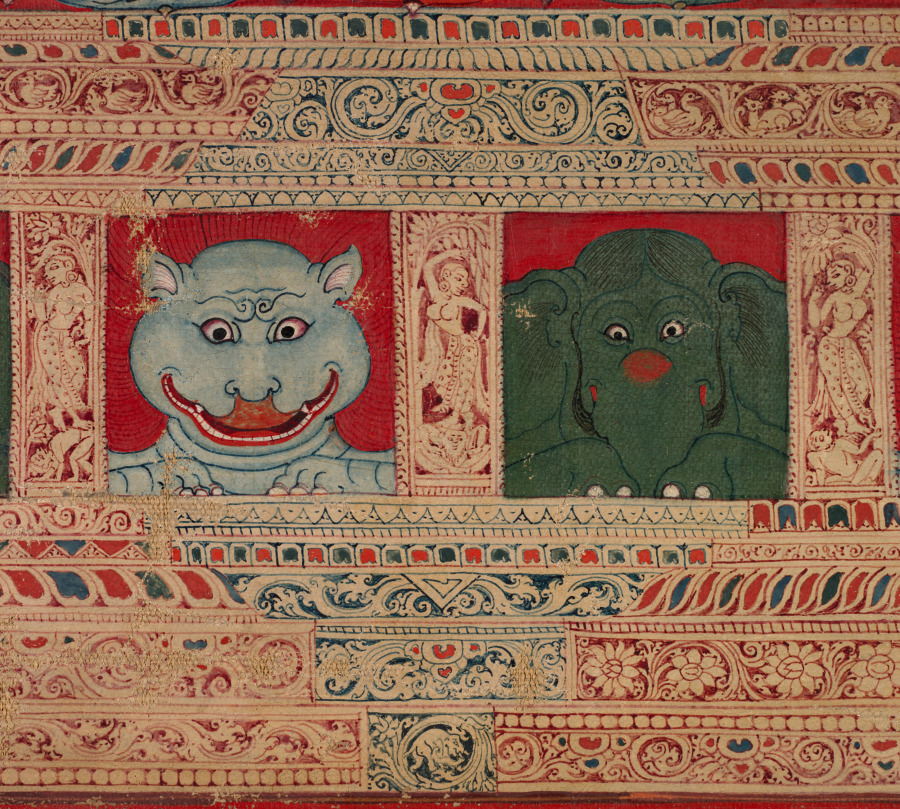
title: Green Tara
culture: Central Tibet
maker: attributed to Aniko (Nepalese, active in Tibet mid- to late 1200s)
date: c. 1260s; mounted, 2020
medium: thangka; gum tempera, ink, and gold on sized cotton; mount: silk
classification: Painting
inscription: Om Ah Hum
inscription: om tare tutare ture svaha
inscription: Om Ah Hum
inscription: Om Ah Hum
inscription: om ah sarva vyida svaha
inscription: ye dharmā hetuprabhavā he- tuṃ teṣāṃ tathāgato hy avadat teṣāṃ ca yo nirodha evaṃvādī mahāśramaṇaḥ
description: For Tibetans, Green Tara is one of the preeminent figures of their Buddhist faith, a radiant savioress who embodies the female form of the perfect, enlightened mind. The Green Tara in the Cleveland thangka—a Tibetan devotional painting on cloth—specifically dispels fear and provides protection, just like her mantra inscribed on the back side of the painting. Her green color and fear-not gesture link her to the cosmic Buddha of the North, enshrined above her head. Most scholars agree that this work was painted by the celebrated Nepalese artist known as Aniko.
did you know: The tiny monastic figure under Green Tara's right hand commissioned the painting.